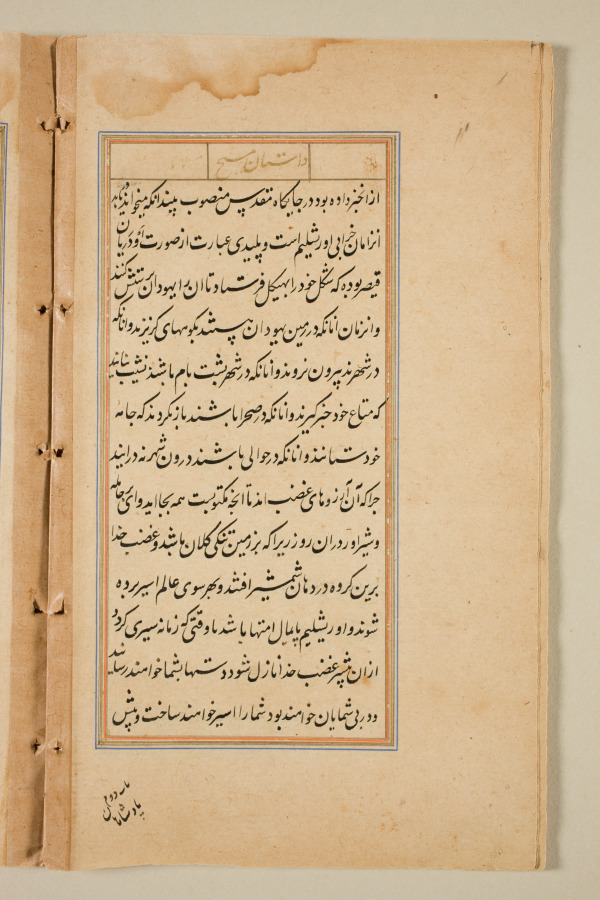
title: Text page from a Mirror of Holiness (Mir’at al-quds) of Father Jerome Xavier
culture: Mughal India, Allahabad, made for Prince Salim (1569–1627)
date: 1602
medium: Ink and gold on paper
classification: Manuscript